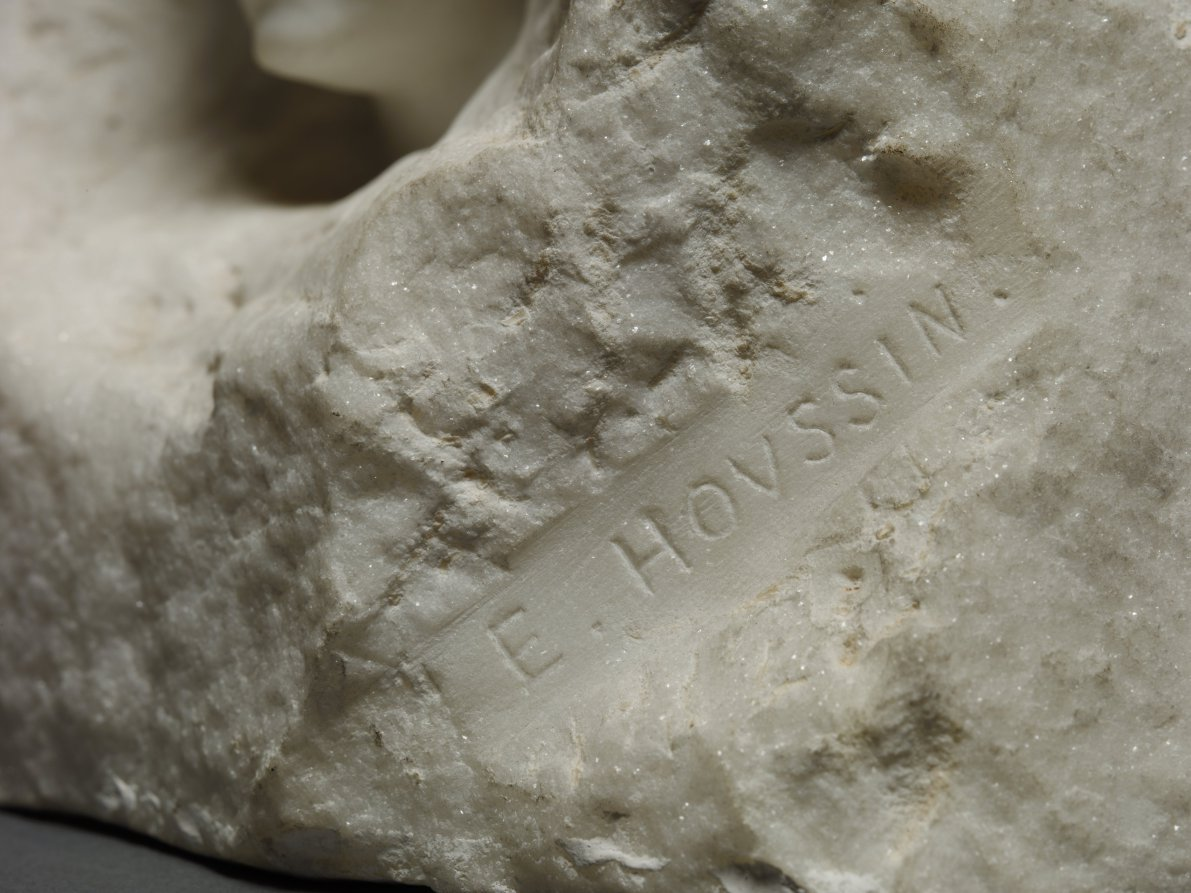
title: Head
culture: France, 19th century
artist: Édouard Charles Marie Houssin (French, 1847–1919)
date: 1893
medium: marble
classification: Sculpture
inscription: Signed lower right: "E. Hovssin"